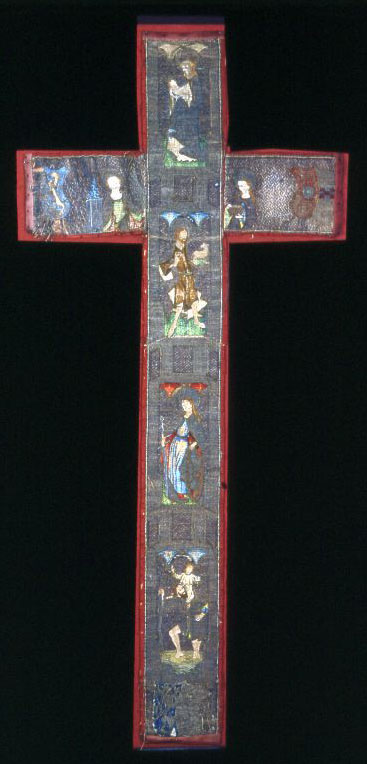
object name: Textile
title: Orphrey Cross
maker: Germany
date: 1475/1525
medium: Linen, plain weave; underlaid with linen, plain weave; appliquéd with linen, plain weave; embroidered with silk, gilt- and silvered-animal-substrate-wrapped linen, and gilt- and silvered-metal-strip-wrapped silk in satin, surface satin, split, and stem stitches; laid work, couching and padded couching; edged with silk, plain weave and wool, warp chevron twill weave tapes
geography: Germany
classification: textile; needlework (visual works); liturgical